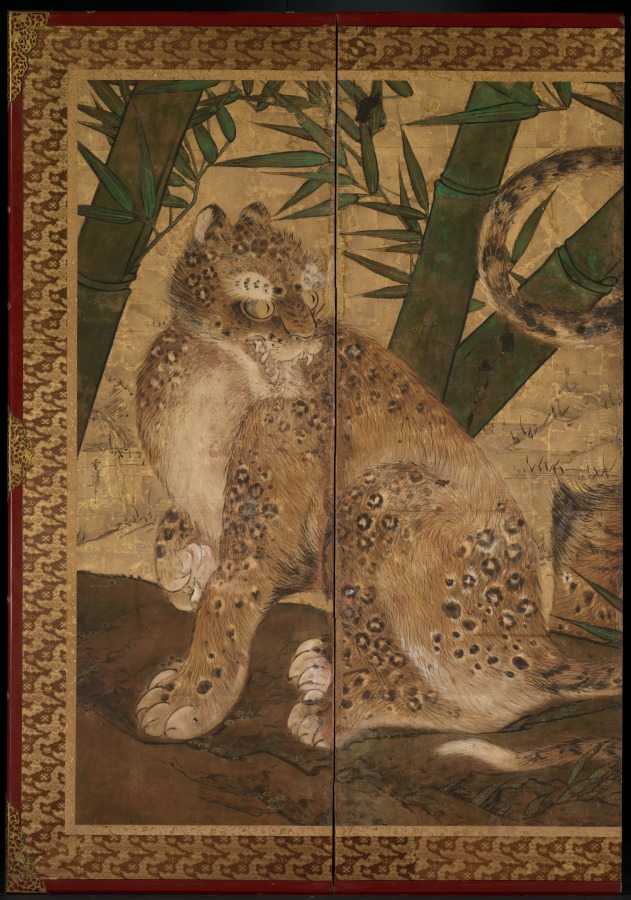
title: Lions and Tigers in Peony and Bamboo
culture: Japan, Edo period (1615–1868)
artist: Yamaguchi Sekkei (Japanese, 1644–1732)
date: 1668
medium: One of a pair of six-panel folding screens; ink and color on gilded paper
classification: Painting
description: Sekkei lived and studied painting in Kyoto at the Kano school studio, the center of traditional painting activity in Japan since 1500. The use of gold foil as a backdrop for the frolicking animals served a practical as well as a decorative function. Because traditional Japanese rooms had no windows, interior lighting came from portable oil lamps and wax candles, whose effects were magnified by reflective surfaces.